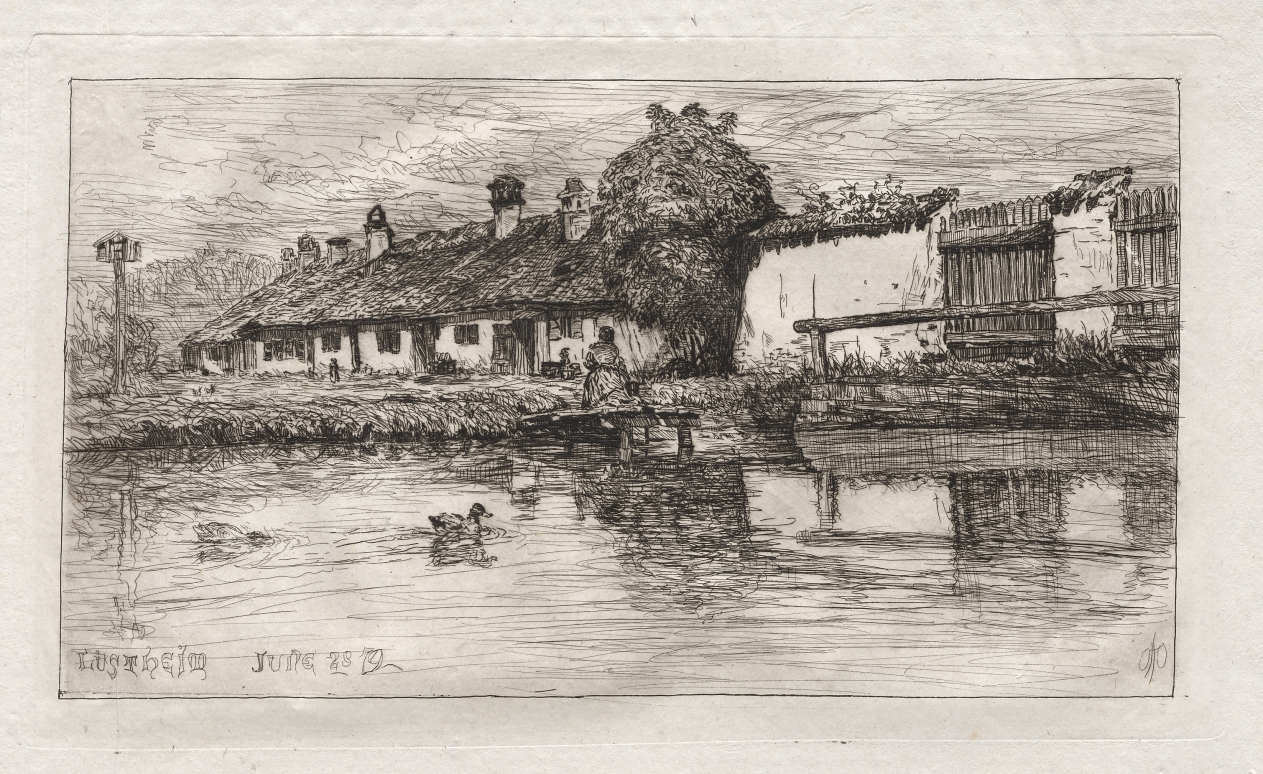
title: Lustheim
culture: America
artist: Otto H. Bacher (American, 1856–1909)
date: 1879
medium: etching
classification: Print